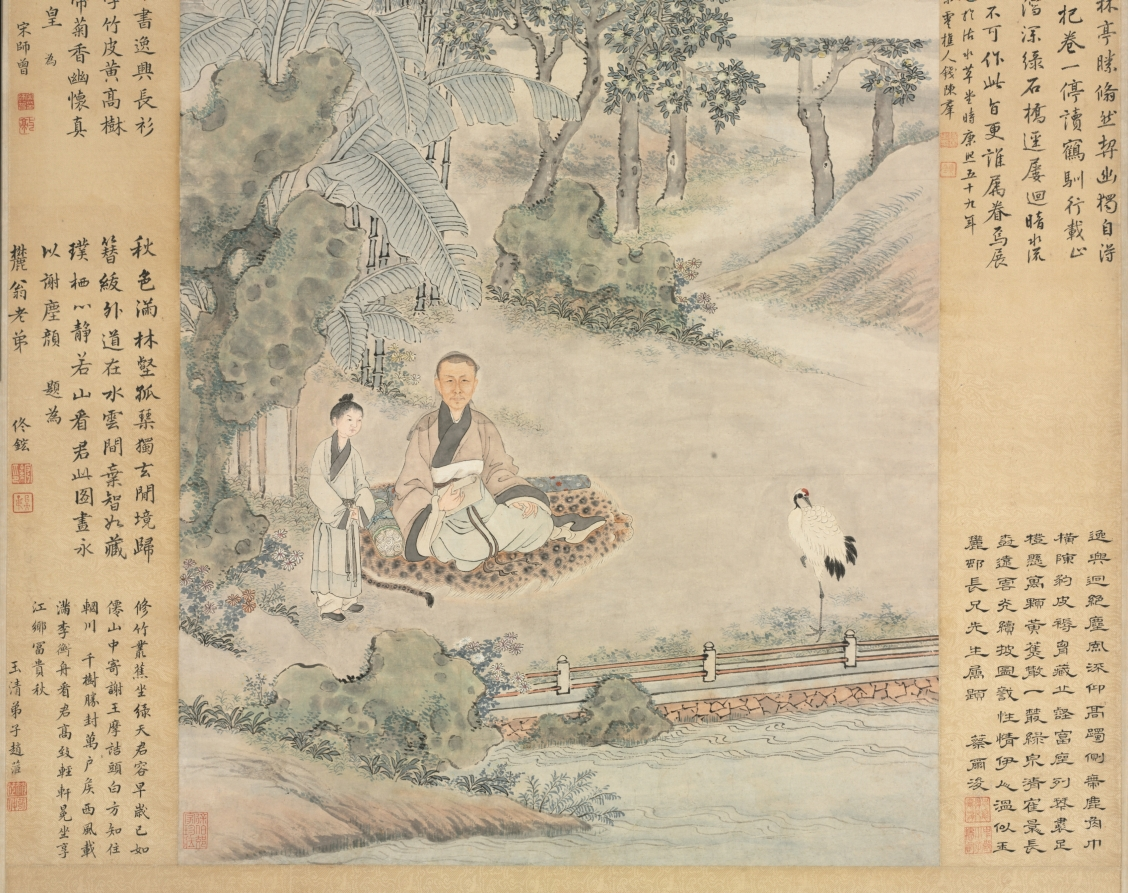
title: Portrait of An Qi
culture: China, Qing dynasty (1644-1911)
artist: Wang Hui (Chinese, 1632–1717)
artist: Tu Luo (Chinese, active c. 1715)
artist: Yang Jin (Chinese, 1644–1728)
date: 1715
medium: hanging scroll; ink and color on paper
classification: Painting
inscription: [印]上下千年. 麓村高逸：康煕乙未季春，廣陵涂洛寫照，海虞楊晉布景，八十四叟王翬補竹石。[印]耕煙; 王翬之印.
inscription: 俯視塵寰逸韻高，襟懷潚灑興偏豪。/ 琴書座右親風雅，竹石池邊拭羽毛。/ 蕉葉亂雲遮北礀，鶴翎凝雪戀東皋。/ 翩翩度量如君少，靜對秋江萬斛濤。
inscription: 知君頗好道，作意洗緐縟。/ 遂窮林亭勝，翛然契幽獨。/ 自得會忘言，餘善時往復。/ 岸幘若有期，把卷一停讀。/ 鶴馴行載正，雲閑斷還續。/ 橘柚欎寒煙，芭蕉瀉深綠。/ 石橋逕屢迴，暗水流亦曲。/ 真心恣奇探，曠景縱遐矚。/ 陶謝不可作，此旨更誰屬。/ 眷焉展斯圖，令我怡心目。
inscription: 逸興迥絶塵，風流仰高躅。/ 側無鹿角巾，横呈豹皮褥。/ 胸藏山壑富，座列琴囊足。/ 橙懸萬顆黄，蕉散一叢綠。/ 泉清鶴景長，樹遠雲光續。/ 披圖識性情，伊人温似玉。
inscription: 風雅出塵寰，披圖見一斑。/ 橘香新雨後，竹影夕陽間。/ 流水鳴前澗，歸雲渡遠山。/ 幽棲如可遂，應許共追攀。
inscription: 蕭灑披襟坐，琴書逸興長。/ 衫分蕉葉碧，冠學竹皮黄。/ 高樹穿雲斷，流泉帶菊香。/ 幽懷真曠達，何地不羲皇。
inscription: 秋色滿林壑，孤琴獨玄閒。/ 境歸簪紱外，道在水雲間。/ 棄智如藏璞，栖心静若山。/ 看君此圖畫，永以謝塵顏。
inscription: 修竹叢蕉坐綠天，君容早歳已如仙。/ 山中寄謝王摩詰，頭白方知住輞川。/ 千樹勝封萬戸侯，西風載滿李衡舟。/ 看君高致輕軒冕，坐享江鄉富貴秋。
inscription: 6 seals unidentified.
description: An Qi, the subject of the portrait, was a second-generation salt merchant from Korea. He used part of his wealth to collect art. At the time this painting was commissioned, An was less than 40 years old. He is represented as a Daoist recluse in nature, informally dressed with attributes such as books and a wrapped guqin instrument, a portrait convention for literati-scholars since the Six Dynasties period (220–589 CE). The local Taihu rock, banana plants, and crane suggest a southern garden and a life in seclusion. An’s portrait is evidence of merchants aspiring to the scholar-official class. According to the inscription, this painting was the joint effort of three men, the eldest and most famous was Wang Hui. While the garden setting is homogenous in style, it contrasts with the application of opaque pigments and shading employed for the depiction of An Qi’s face.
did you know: Seven of An Qi's close friends wrote poetic inscriptions on the silk brocade mount around his portrait.